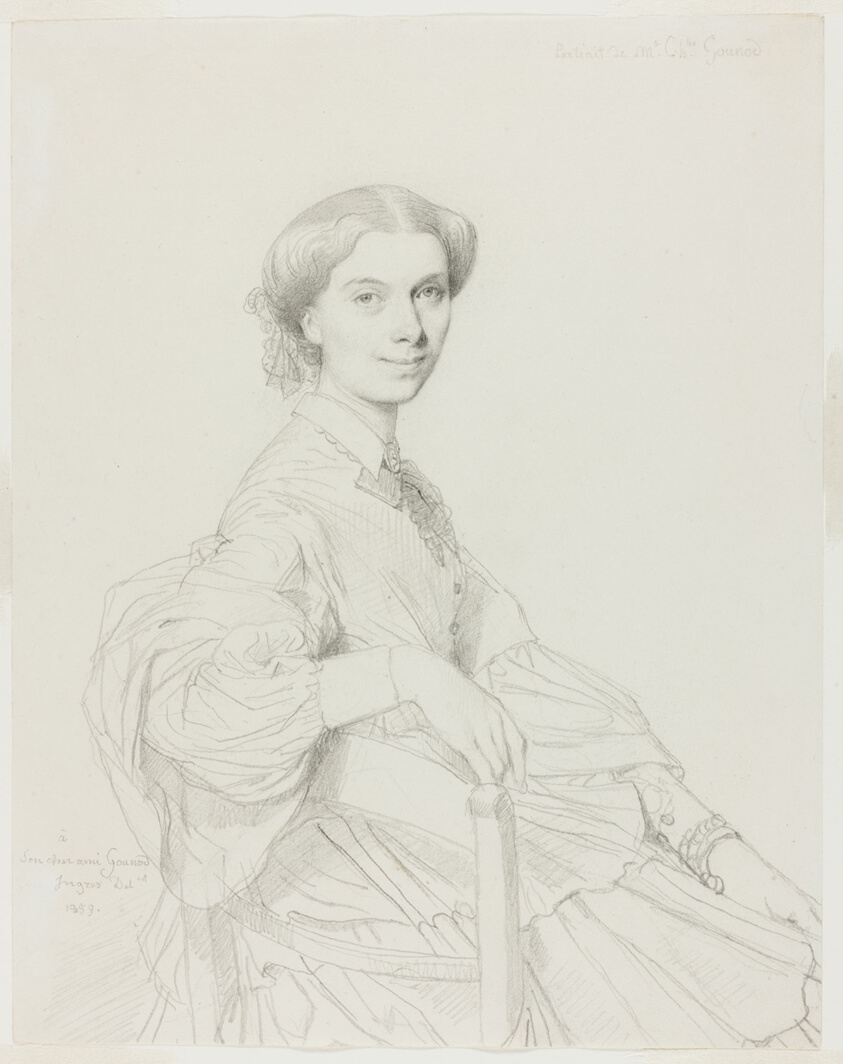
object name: Drawing and Watercolor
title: Madame Charles Gounod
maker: Jean–Auguste–Dominique Ingres; French, 1780–1867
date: 1859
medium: Graphite on ivory wove paper (discolored to cream)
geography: France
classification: graphite; drawings (visual works); prints and drawing